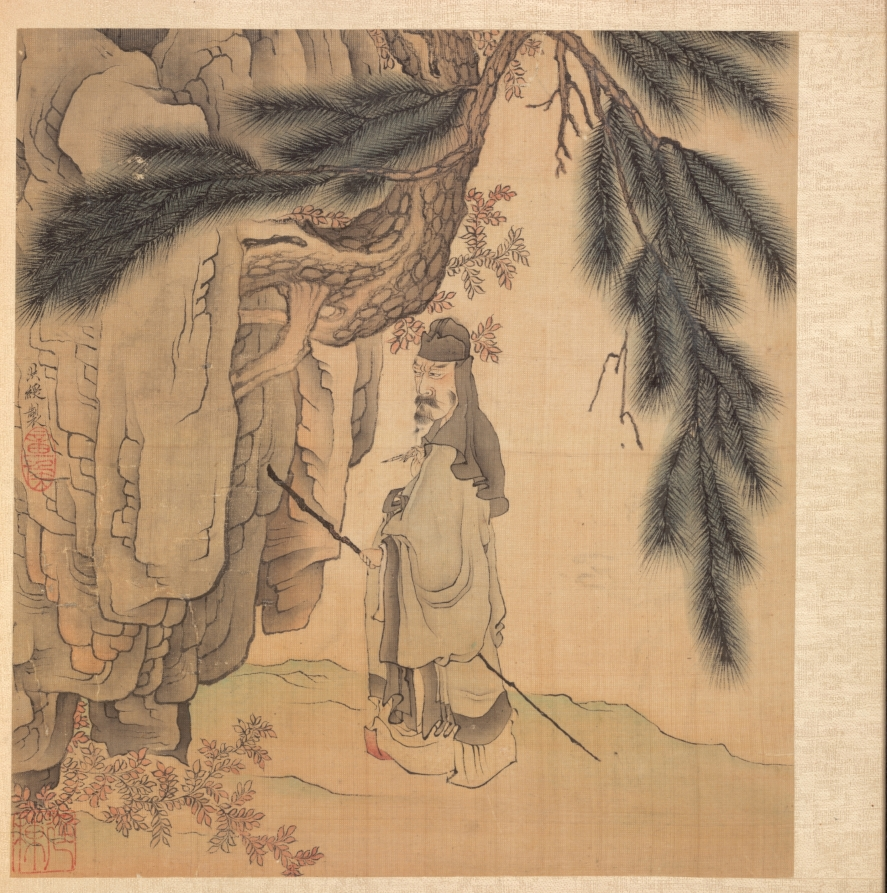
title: Paintings after Ancient Masters: Scholar with Staff and Brush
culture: China, Ming dynasty (1368–1644)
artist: Chen Hongshou (Chinese, 1598/99–1652)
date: 1598–1652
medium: album leaf; ink and color on silk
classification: Painting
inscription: Hongshou [seal] Zhanghou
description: The twenty paintings in this double album by Chen Hongshou include landscapes, figures, and flowers. It also has one leaf featuring a woman, an often-used subject not found in the other albums from the latter part of his career. His late works are wonderful summations of Chen's peculiar and quirky art—archaistic, hyper-refined—but without accompanying shallowness or sentimentality. His figures and landscapes in the late albums are miniaturized, not unlike the small Chinese gardens, or the carefully selected small table rocks or old roots used for contemplation to see the world in miniature. This loss of scale is quite deliberate and reflects the psychological situation of a depressed class like the Ming loyalist officials and scholars, deprived of their integrity and honor, and forced to lead a diminished and restricted existence.